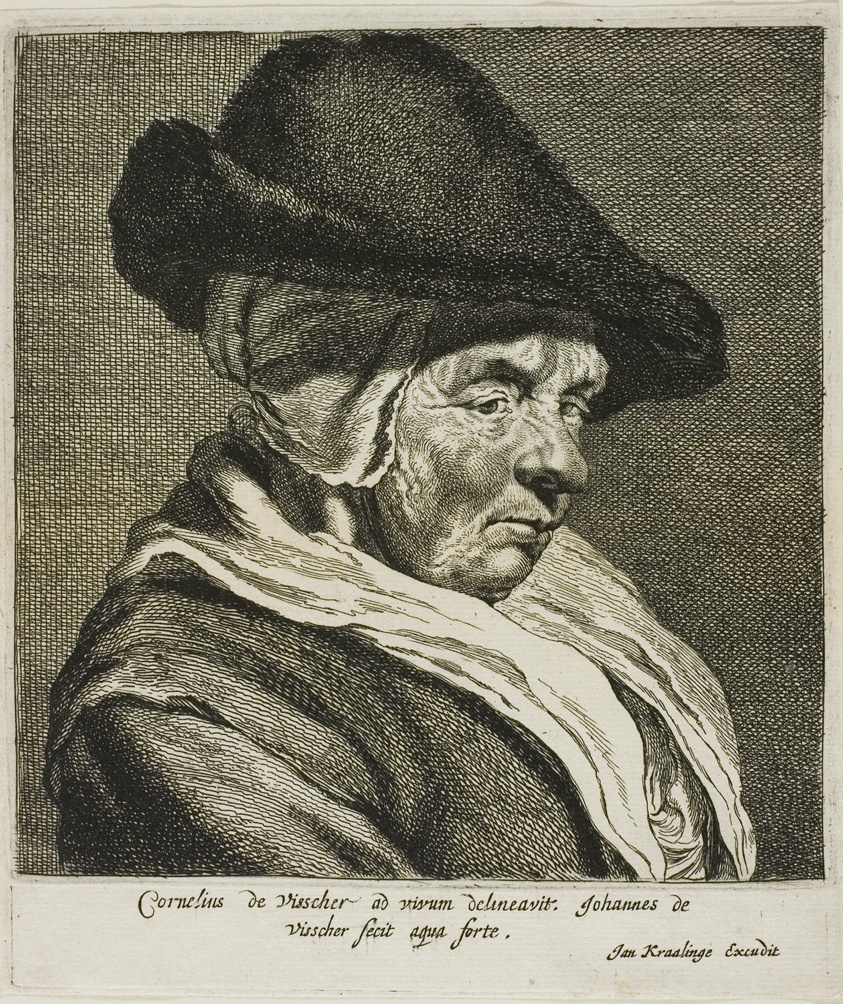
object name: Print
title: Portrait of an Old Woman, Visscher's Mother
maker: Jan Visscher (Dutch, 1634-1692); after Cornelis Visscher (Dutch, c. 1629-1658); Jan Kraalinge (Dutch, active 17th century)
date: c. 1655-1690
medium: Etching on ivory laid paper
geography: Holland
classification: etching; print; prints and drawing